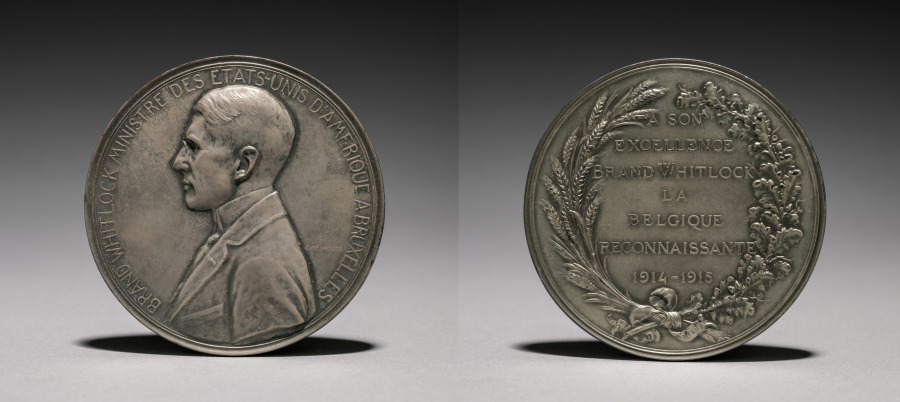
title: Medal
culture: Belgium, 20th century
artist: Godefroid Devreese (Belgian, 1861–1941)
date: 1914–1915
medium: bronze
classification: Metalwork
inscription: "Brand Whitlock ministre de Etats-unis D'Amerique a Bruxelles."